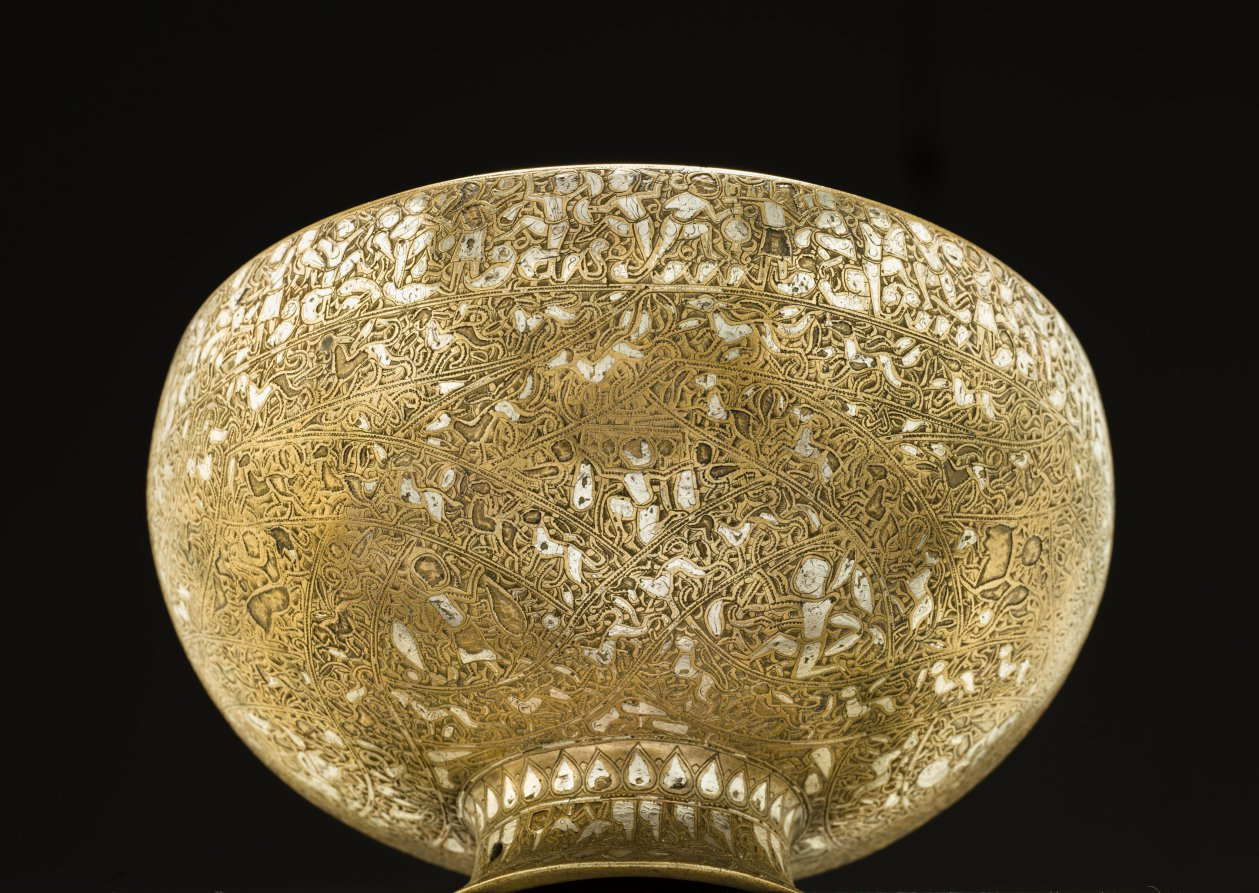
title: The Wade Cup with Animated Script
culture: Iran, Seljuq period of Iran (1037–1194)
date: 1200–1221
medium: brass inlaid with silver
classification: Metalwork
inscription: Glory, and success, and government, and bliss, and soundness, and peace of mind, and mercy, and well-being, and good health, and duration, and increase, and satisfaction, and care, and continuance to its owner.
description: The highlight of the cup’s decoration is the inscription around the rim, which you see on the walls around you, with letters composed of human figures, animals, and birds. This is known as animated script and it developed in northeast Iran or Afghanistan during the mid-1100s and migrated westward. The inscription on the rim of the Wade Cup is the pinnacle of this form of script with its full-figure animation. The body of the cup is covered with interlacing bands of compartments containing tiny figures of humans and animals. These represent the 12 signs of the zodiac from astrology, the practice of interpreting the influence of planets and stars on earthly affairs. Astrology began in Mesopotamia, was adopted by the Greeks, and then absorbed into medieval Islamic culture through translations of Greek texts.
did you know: This is known as the Wade Cup, after J. H. Wade who bequeathed the funds for its acquisition